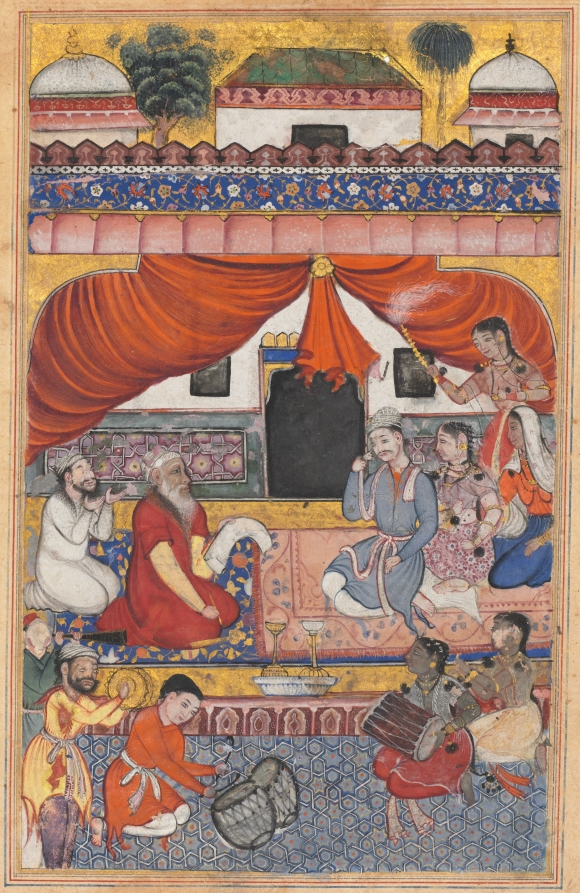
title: Preparation for the marriage of Mahmuda to the Young Vizier, from a Tuti-nama (Tales of a Parrot): Thirty-third Night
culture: Mughal India, court of Akbar (reigned 1556–1605)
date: c. 1560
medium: gum tempera, ink, and gold on paper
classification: Painting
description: In the lower register of this bustling scene, musicians play in celebration of the impending wedding. Above, the betrothed couple sits at the right. Although Mahmuda was happily engaged to her childhood sweetheart, Ayaz, the young vizier wanted her for himself. Mahmuda’s father, the grand vizier, agrees to the arrangement. Heartbroken, Ayaz believes he has lost Mahmuda forever.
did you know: Mahmuda’s name means “praised” or “blessed.”